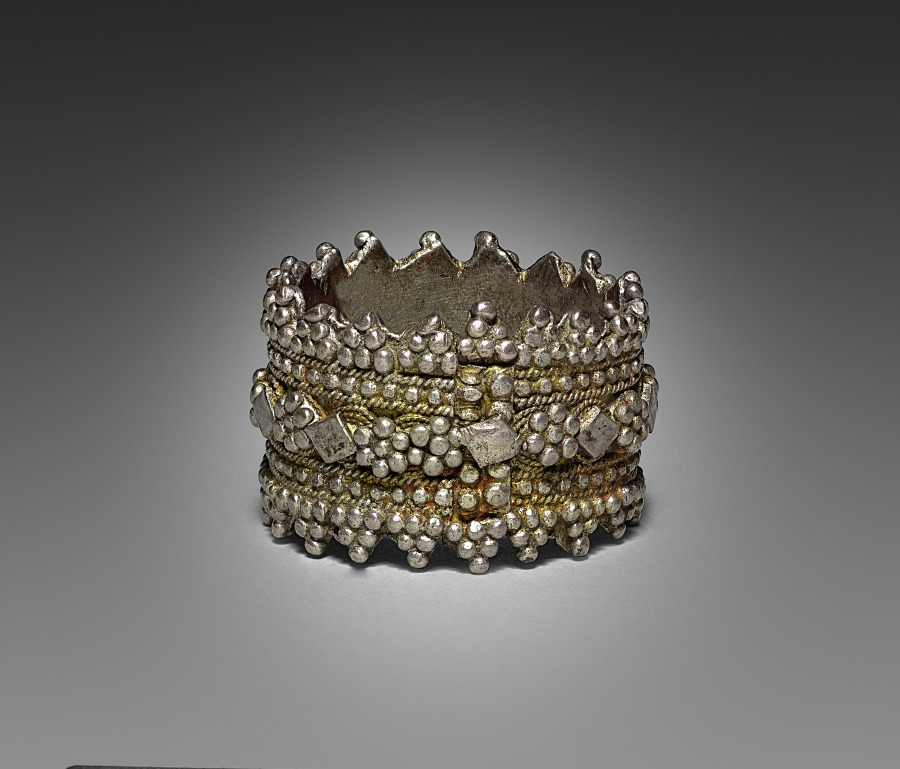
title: Ring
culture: India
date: early 1900s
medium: silver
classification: Jewelry